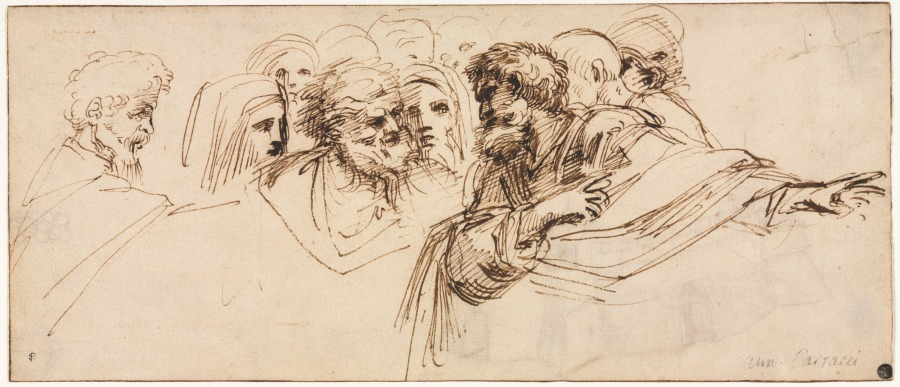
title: Study of Heads (recto); Crenelated Fortress (verso)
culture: Italy, second half 16th century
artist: Agostino Carracci (Italian, 1557–1602)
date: 2nd half 1500s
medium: pen and brown ink; framing lines in brown ink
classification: Drawing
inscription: lower right, in black chalk: Ann . Carracci